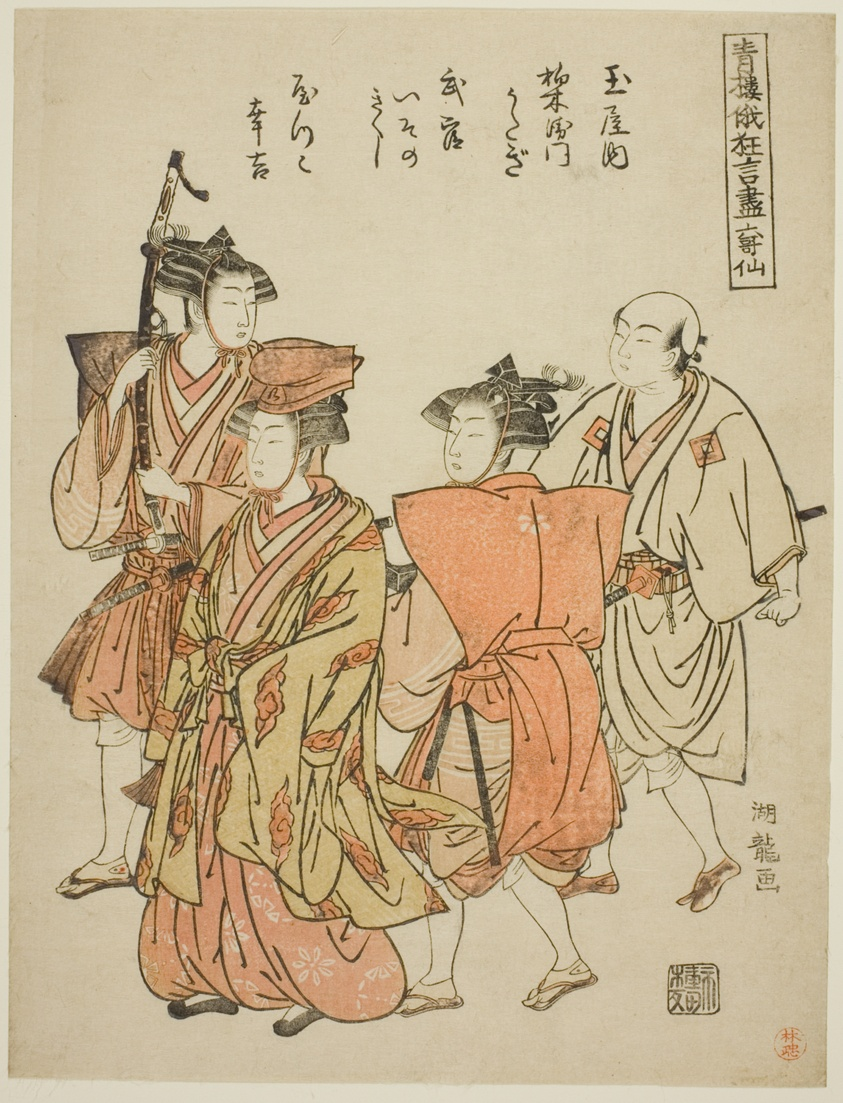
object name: Print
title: The Six Immortal Poets (Rokkasen), from the series "Collection of Comic Performances from the Niwaka Festival in the Pleasure Quarters (Seiro niwaka kyogen zukushi)"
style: Japanese (culture or style)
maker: Isoda Koryusai (Japanese, 1735-1790)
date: c. 1776/81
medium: Color woodblock print; chuban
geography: Japan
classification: woodblock print; print; asian art